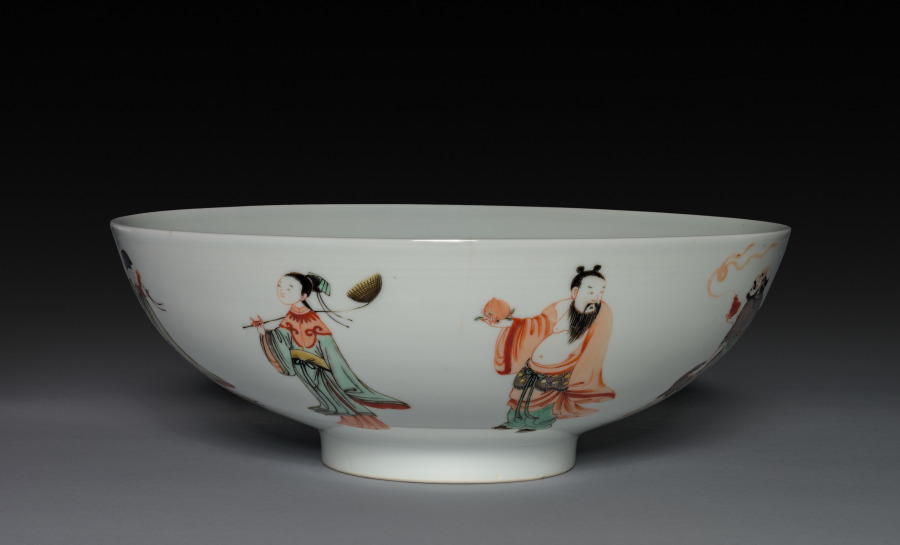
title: Bowl with Eight Immortals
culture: China, Jiangxi province, Jingdezhen kilns, Qing dynasty (1644-1911), Kangxi reign (1662-1722)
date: 1662–1722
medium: porcelain with famille verte overglaze enamel decoration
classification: Ceramic